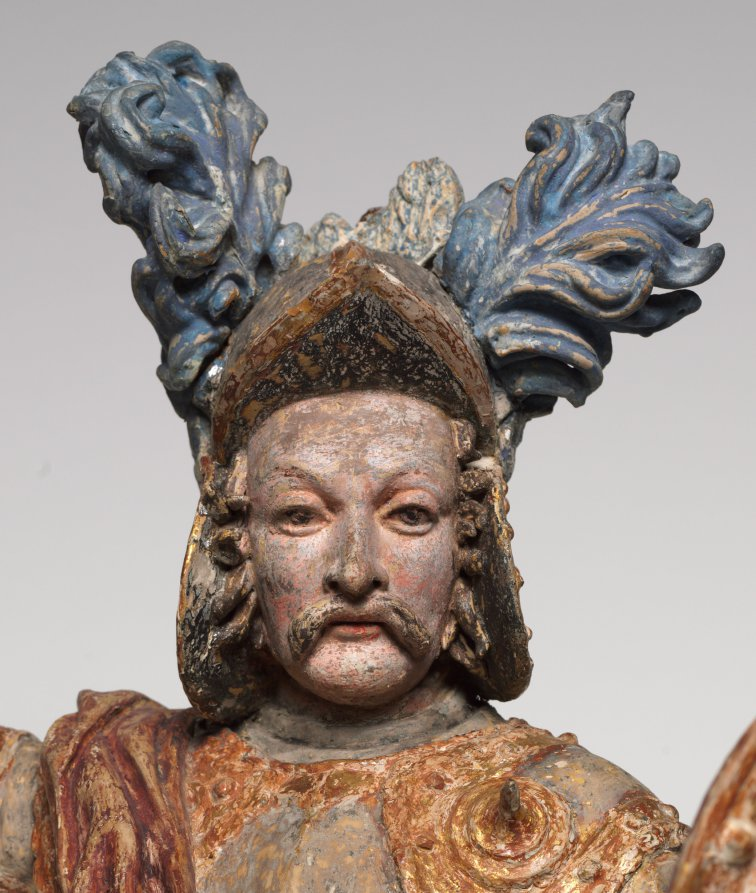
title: Saint George and the Dragon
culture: South Germany or Austria, late 17th century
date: late 1600s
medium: painted and gilded wood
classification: Sculpture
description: Saint George, a Roman soldier martyred for his Christian faith, is best known for slaying a fearsome dragon that terrorized the city of Silene, in Libya. George offered to kill the monster if residents of the city convert to Christianity. Here, George stands triumphantly over the dragon, writhing as it dies. The artist deliberately incorporated features intended to make his figure seem more familiar: the dragon seems more canine than reptilian, while George wears armor from the recent past and bears almost portrait-like facial features.